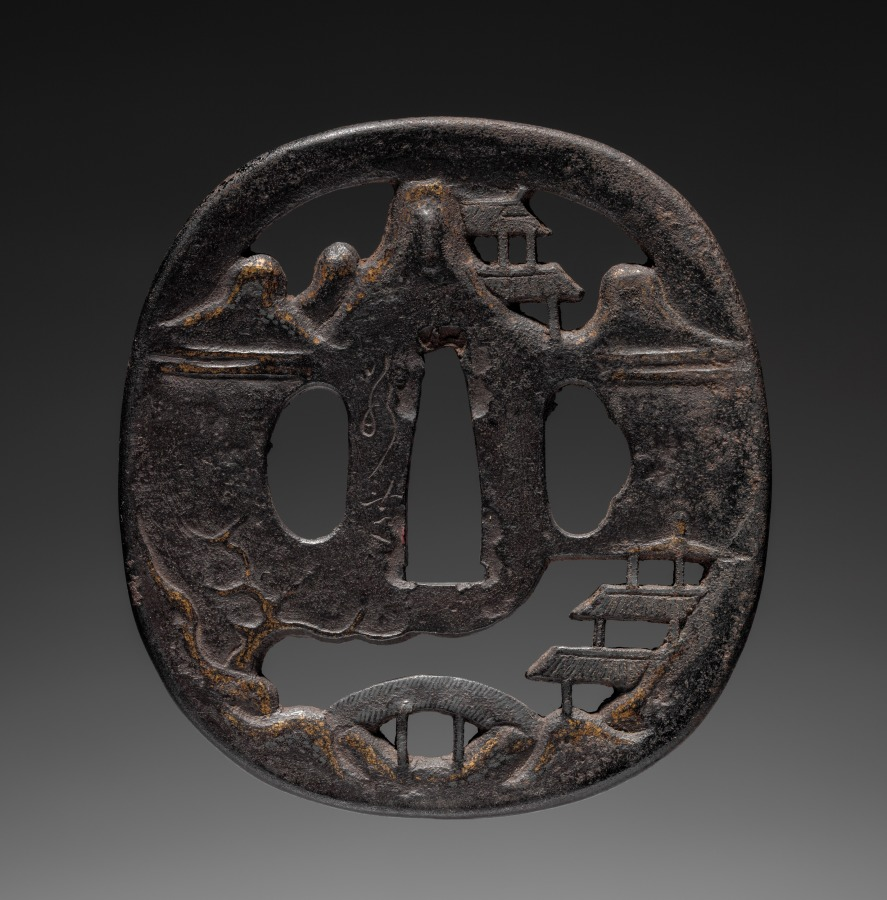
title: Sword Guard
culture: Japan, Edo period (1615–1868)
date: late 1600s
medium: iron (Jakushi type)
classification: Arms and Armor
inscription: signed "Jakushi."